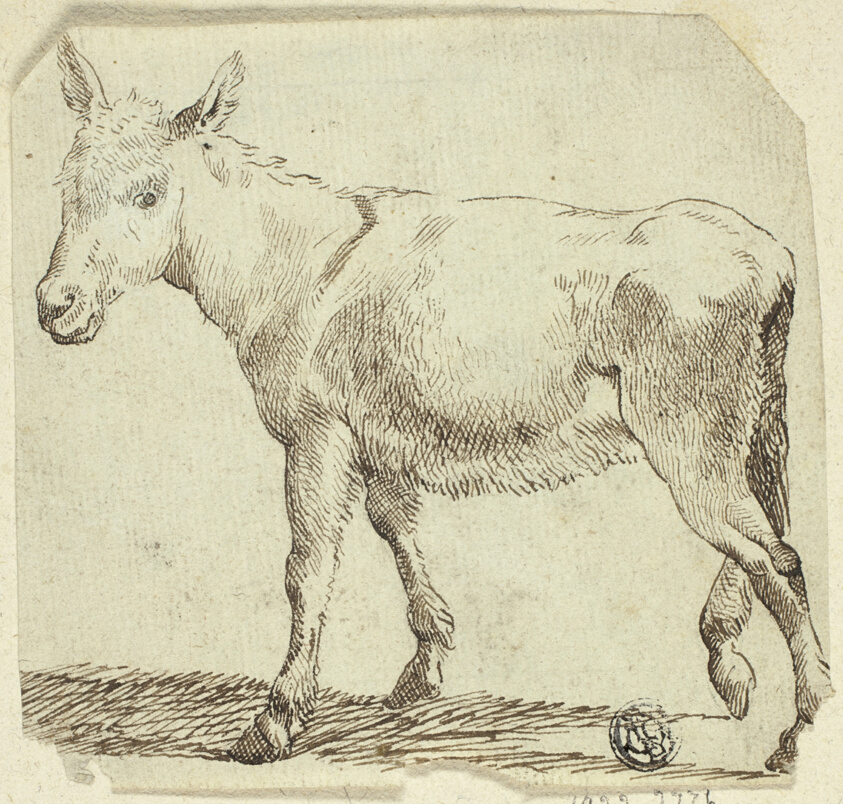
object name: Drawing and Watercolor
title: Donkey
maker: Unknown Artist; English, 19th century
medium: Pen and brown ink on pale green laid paper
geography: United Kingdom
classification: pen and ink drawings; paper; drawings (visual works); prints and drawing